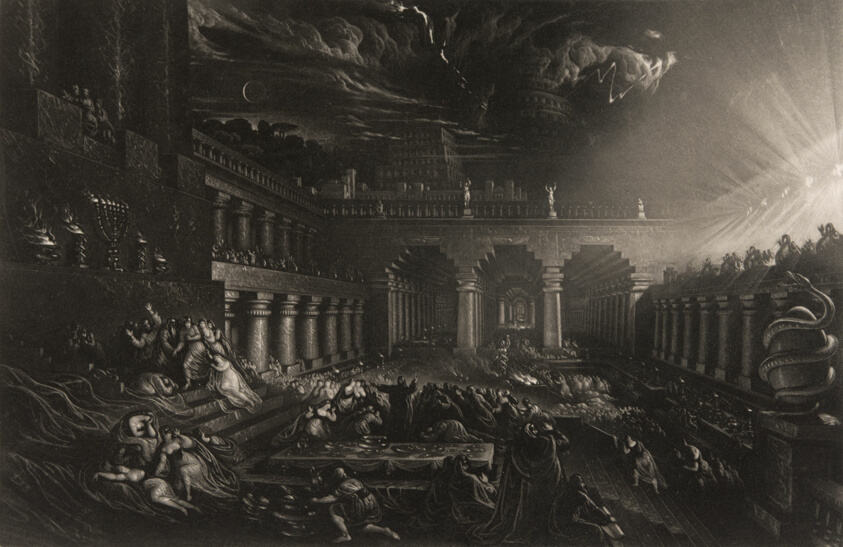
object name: Print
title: Belshazzar's Feast, from Illustrations of the Bible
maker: John Martin (English, 1789-1854)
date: 1835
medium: Mezzotint with etching in black on ivory wove paper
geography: England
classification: mezzotint; print; prints and drawing